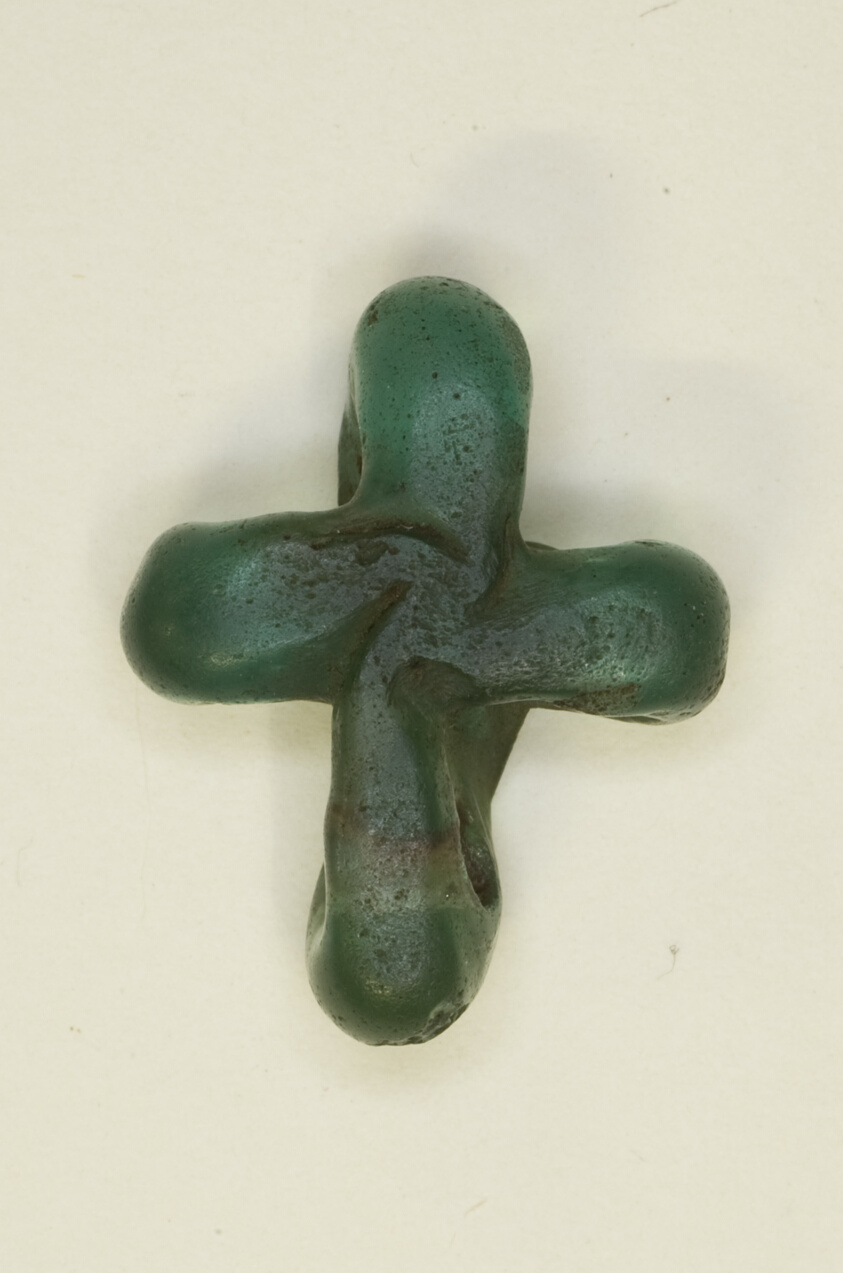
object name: Costume and Accessories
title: Amulet of a Cross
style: byzantine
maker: Byzantine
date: Byzantine, 4th century or later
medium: Glass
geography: Egypt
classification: ceramics; jewelry; bead; ancient art; costume